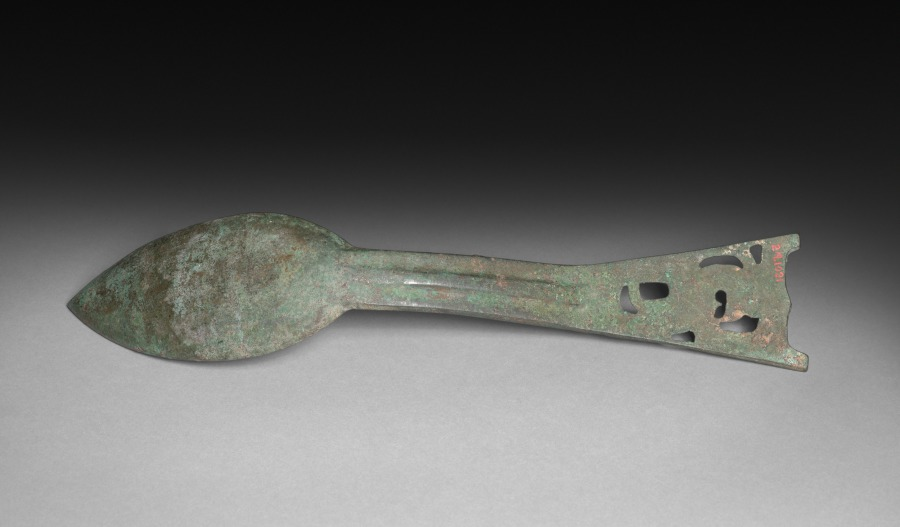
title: Sacrificial Spoon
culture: China, Western Zhou dynasty (c. 1046–771 BCE)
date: 1023–900 BCE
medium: bronze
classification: Metalwork